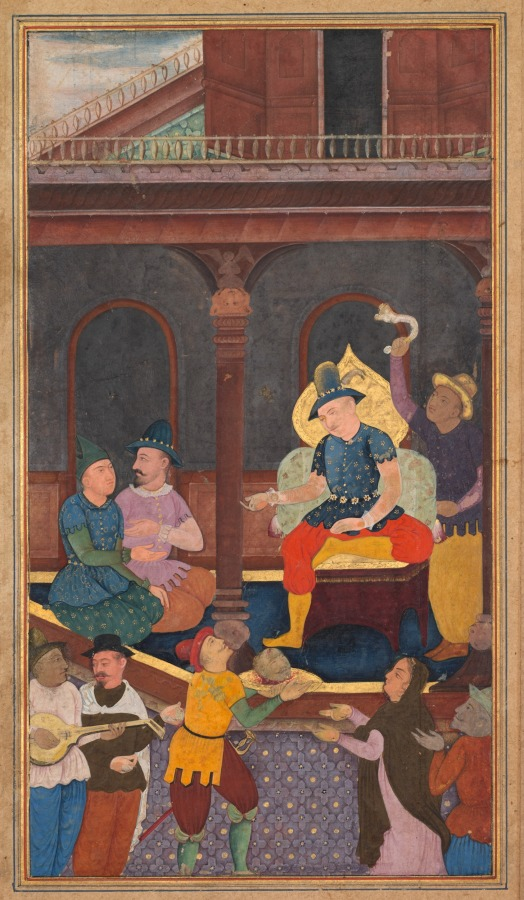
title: Salome Receiving John the Baptist’s Head on a Platter (folio 112 verso), from a Mirror of Holiness (Mir’at al-quds) of Father Jerome Xavier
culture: Mughal India, Allahabad, made for Prince Salim (1569–1627)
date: 1602–4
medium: Gum tempera, ink, color, and gold on paper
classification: Manuscript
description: Herod, King of Judea, sits on a Mughal-style throne as his wife’s daughter Salome reaches for the freshly severed head of John the Baptist. John had offended Herod’s wife, so she took revenge by having her daughter seduce Herod into granting her this wish. Salome is depicted modestly in this painting, and the court musician at the lower left looks on in disgust. The lion head capitals on the pillars above Herod are upside down, seemingly in disapproval of the debauched king.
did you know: Column capitals in Herod’s palace have angels seated on upside-down lion heads.